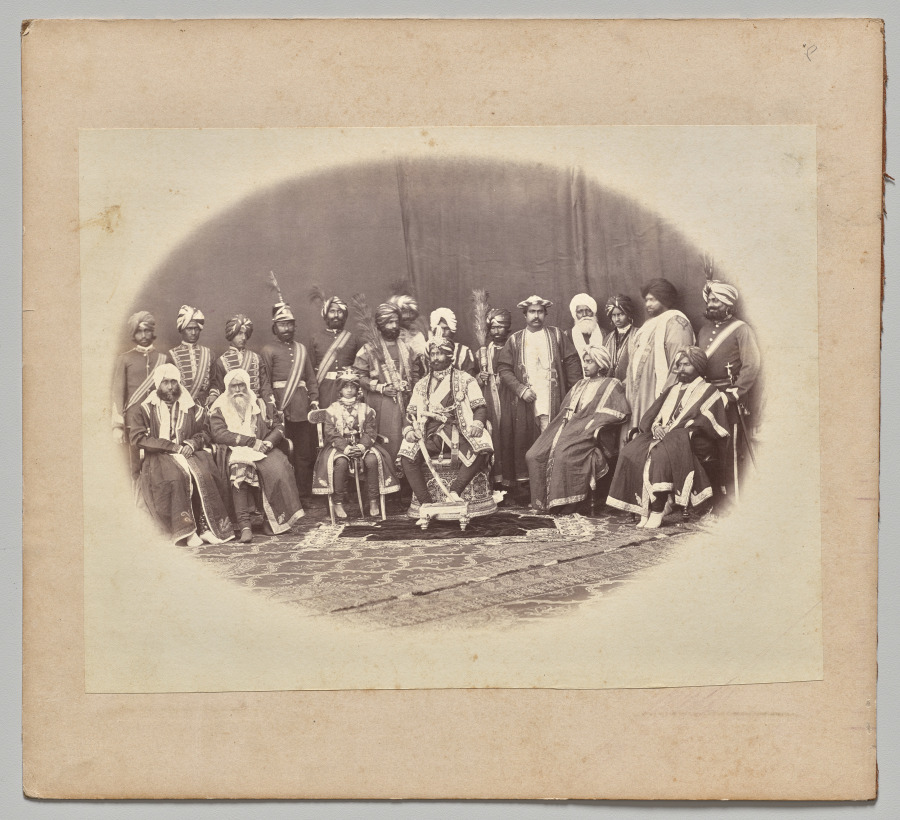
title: Maharaja Ranbir Singh of Jammu and Kashmir with Sons and Courtiers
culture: Northern India, Pahari kingdoms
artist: Bourne & Shepherd (British, active India, 1868–2016)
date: 1870s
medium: albumen print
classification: Photograph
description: Ranbir Singha (1830-1885) was a Pahari raja and son of the founder of the Jammu and Kashmir state, which he ruled for almost 30 years. He established a modern judicial code and a silk factory in his state and was a scholar of the Sanskrit and Persian languages. One of his four sons—it is not known which one—sits beside him for this portrait.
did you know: Anchoring the center of this oval composition is the maharaja, resplendent in richly embroidered robes and jewels and wearing a sword and a dagger.